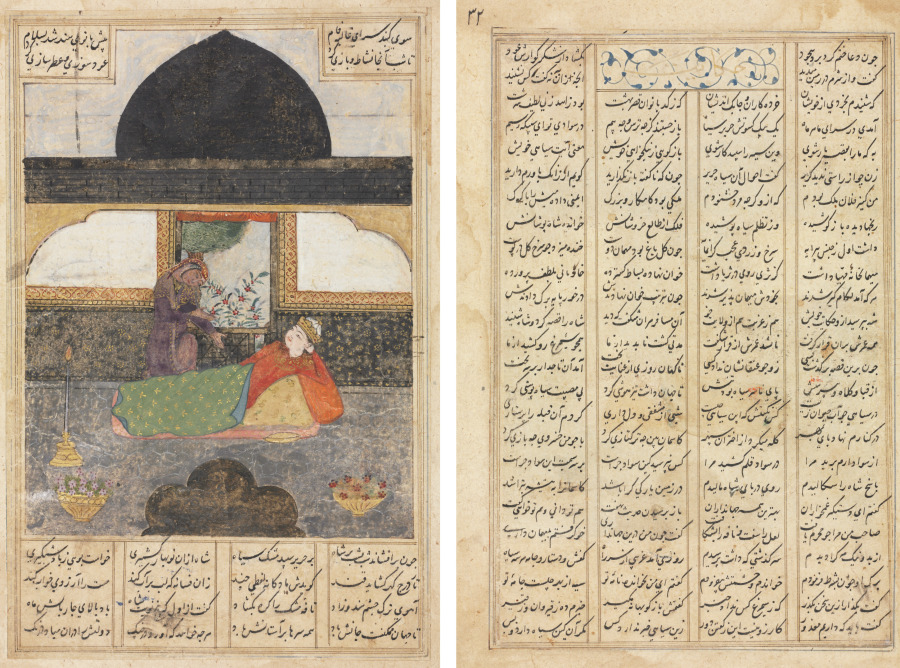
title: Bahram Gur Visits the Princess of India in the Black Pavilion, Illustration and Text, Persian Verses (recto); Bahram Gur Visits the Princess of India, Text Page, Persian Verses (verso)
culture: Iran, possibly Tabriz or Shiraz, Timurid Period, early 15th century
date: c. 1400–1410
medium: opaque watercolor and ink on paper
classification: Manuscript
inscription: script: Nasta'liq